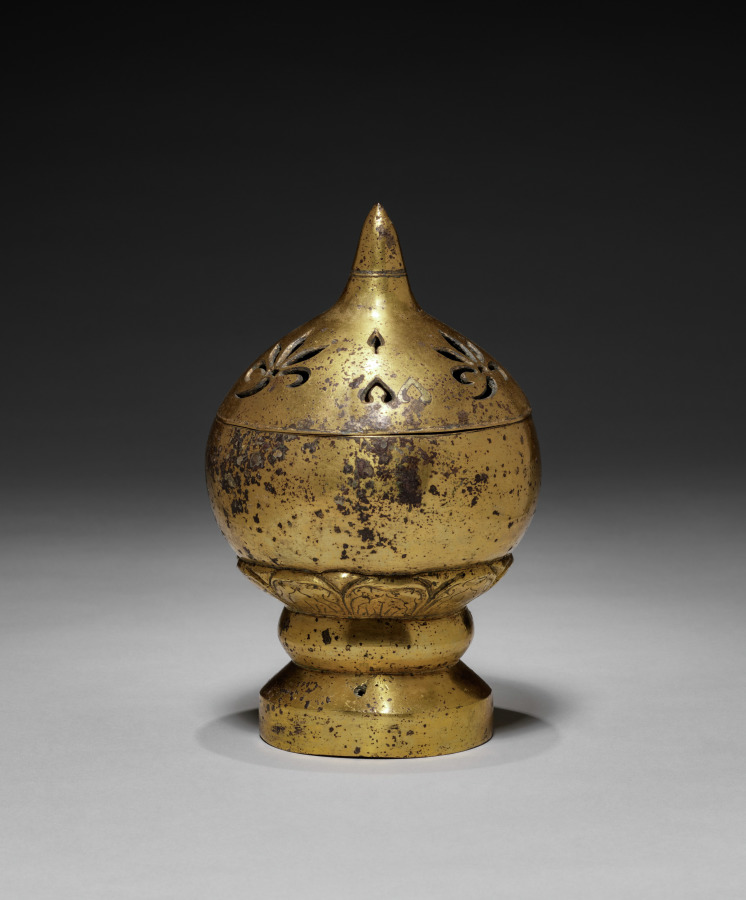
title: Censer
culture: China, Tang dynasty (618–907)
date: early 600s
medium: gilt bronze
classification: Metalwork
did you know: The censor's base has a band of incised lotus-petal motifs, while the pointed lid has openwork floral motifs to release the incense's aroma.